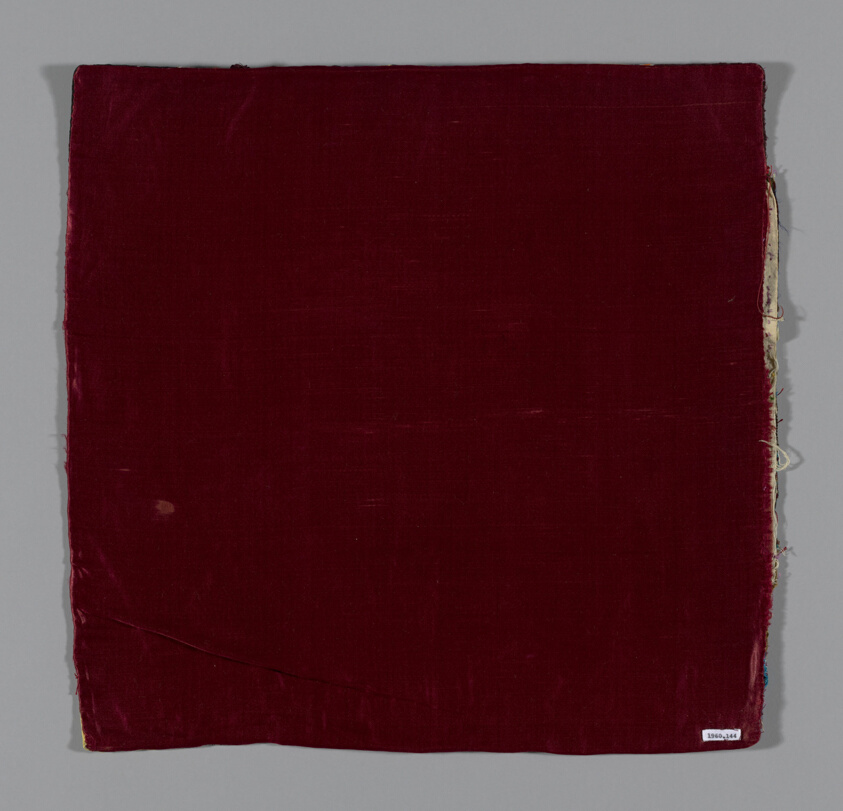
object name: Textile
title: Fragment from Bedcover (Crazy Quilt Block)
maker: United States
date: c. 1884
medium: Silk, in a variety of weaves including cut velvet weave; pieced; embroidered in silk threads in a variety of stitches; backed with cotton, plain weave; lined with silk, satin weave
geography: United States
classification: needlework - quilt; textile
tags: zigzags, paisley, stripes, floral, flowers, stars, moon